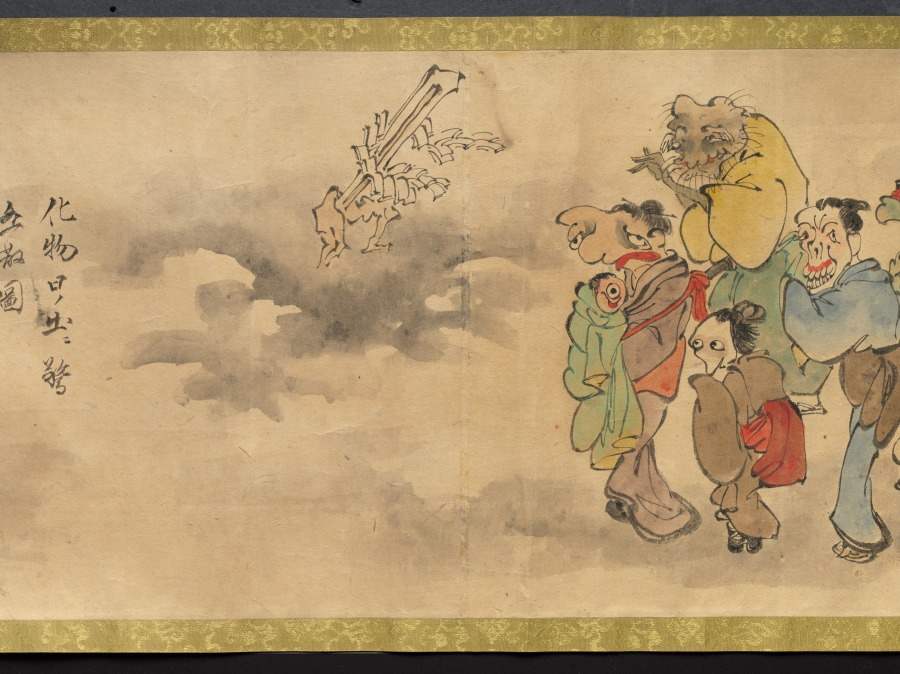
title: An Illustrated Marriage of Apparitions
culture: Japan, Edo period (1615–1868)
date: mid-1800s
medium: handscroll; ink and color on paper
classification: Painting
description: The matchmaking, engagement, wedding, and birth of the first child of two apparitions, or bakemono, literally "things that change," are illustrated in this whimsical, humorous handscroll. Japanese folklore abounds with such strange creatures, most famously represented in handscrolls featuring a procession of 100 supernatural monsters. Aside from a textual preface and cartouches indicating the content of the scenes, the tale is told visually. The artist and whereabouts of the original handscroll are unknown, but a number of other 19th-century copies by amateur painters exist in Japanese collections, attesting to its broad appeal.